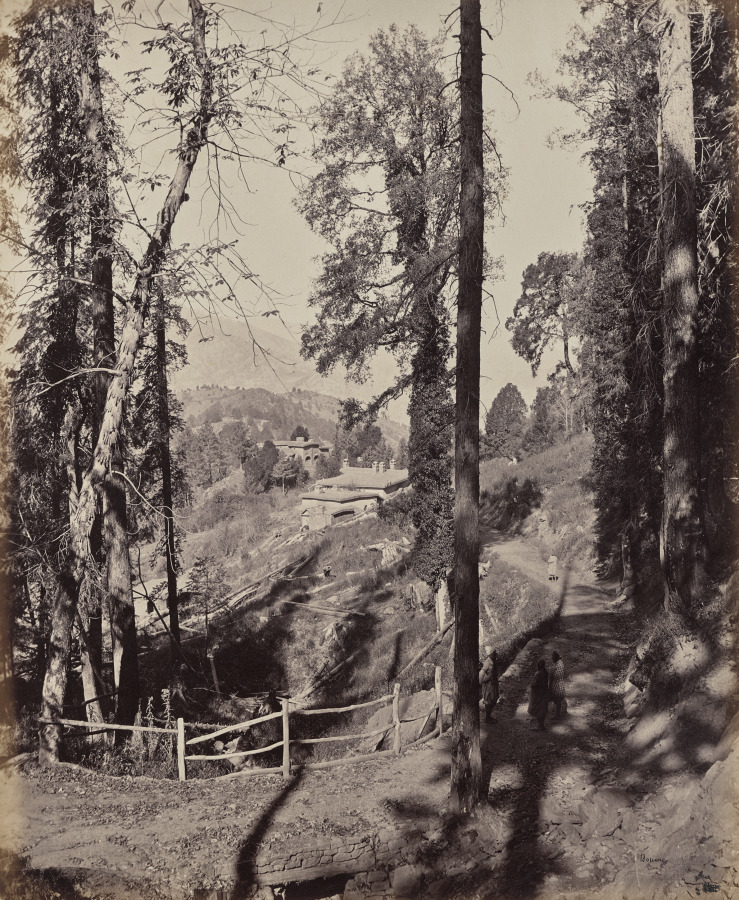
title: Murree. A Hill Station in the Himmalayahs, View Through the Forest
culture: England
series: Photographs of Northern India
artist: Samuel Bourne (British, 1834–1912)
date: 1863–70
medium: albumen print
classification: Photograph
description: The 50 images in this album, all taken in the 1860s, move from the hill towns of the Himalayas down to cities including Lahore (now in Pakistan), Delhi, Lucknow, Agra, Benares (now Varansi), and Calcutta (now Kolkata). Architectural studies of major monuments offer valuable historical records of what sites such as the Taj Mahal and the imperial mosque of the Mughal emperors in Delhi looked like before twentieth-century restorations.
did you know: Samuel Bourne, the author of most the images in this album, was a banker in England before he moved to India to become a professional photographer.